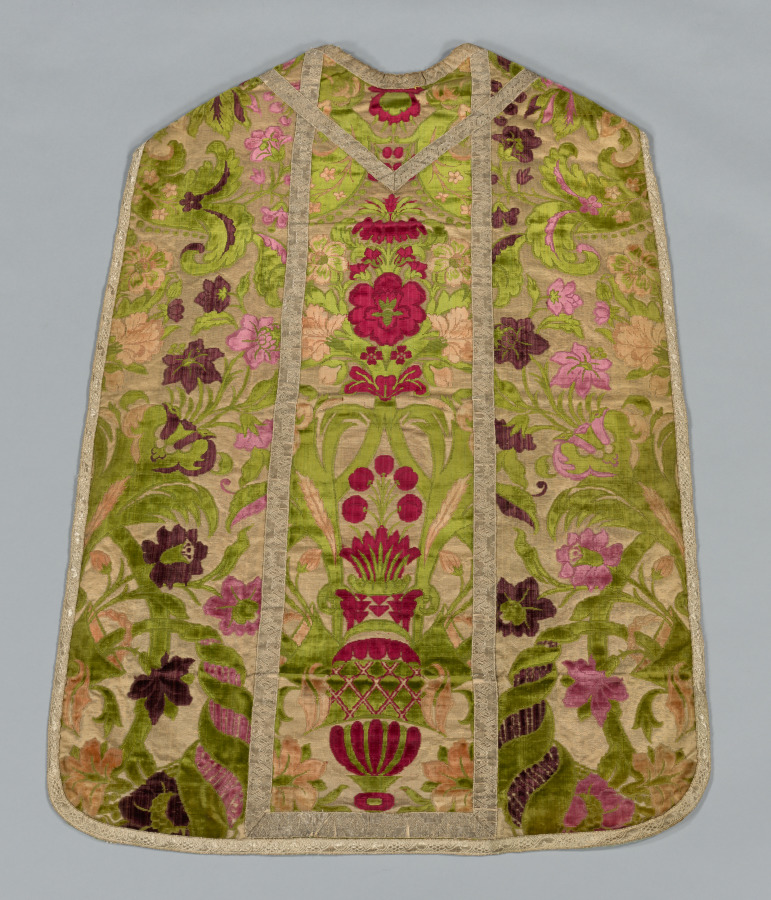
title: Chasuble, Stole, Burse (Corporal Case), and Maniple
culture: Italy, Genoa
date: 1600s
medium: woven polychrome silk and gilt metal threads, cut and uncut velvet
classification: Velvet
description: This sumptuous polychrome velvet displays a central vase with abundant flora and exotic leaves flanking curving blossoming fronds on a gilt-metal thread ground. The pattern was created with five colors of cut and uncut (loops) velvet pile. Only the pile warps for the lush green velvet occur across the entire cloth, while each additional color appears in vertical stripes—crimson, peach, rose, and purple. These widely acclaimed velvets from Genoa were the most colorful woven in Europe. Both the long stole and the shorter maniple are insignia of the office of deacons, priests, and the higher clergy. The stole was worn under a chasuble according to the office and the maniple was hung on the left forearm. The burse is a stiff receptacle in which the folded corporal, a white linen cloth on which the sacred bread and chalice are placed during the Mass, is carried to and from the altar. The upper fabric matches the chasuble, the bottom is a plain silk, and the interior has an obligatory linen lining.